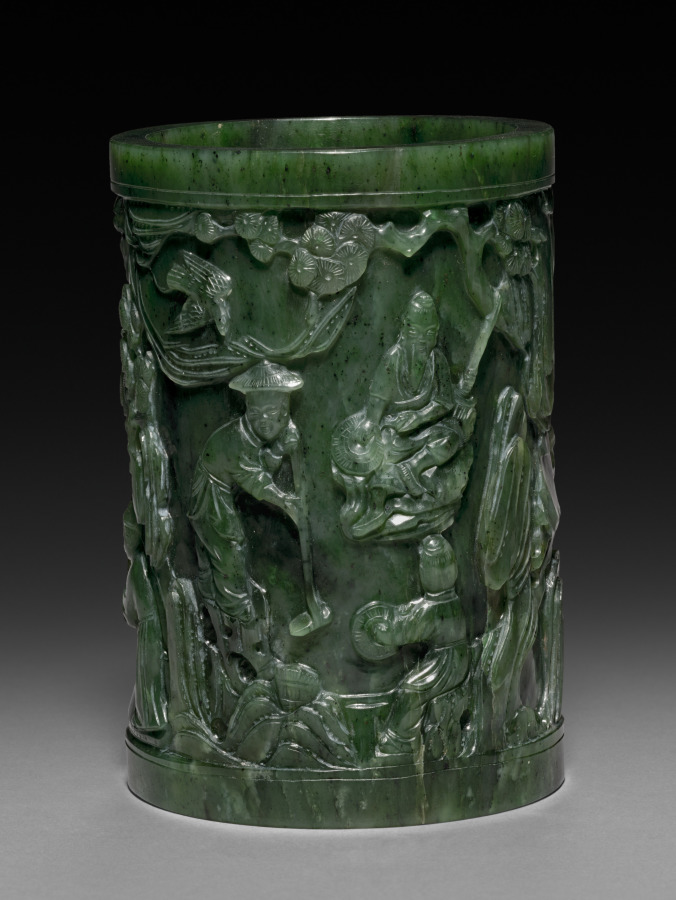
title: Brush Holder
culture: China, Qing dynasty (1644-1911)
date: 1800s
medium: spinach jade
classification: Jade